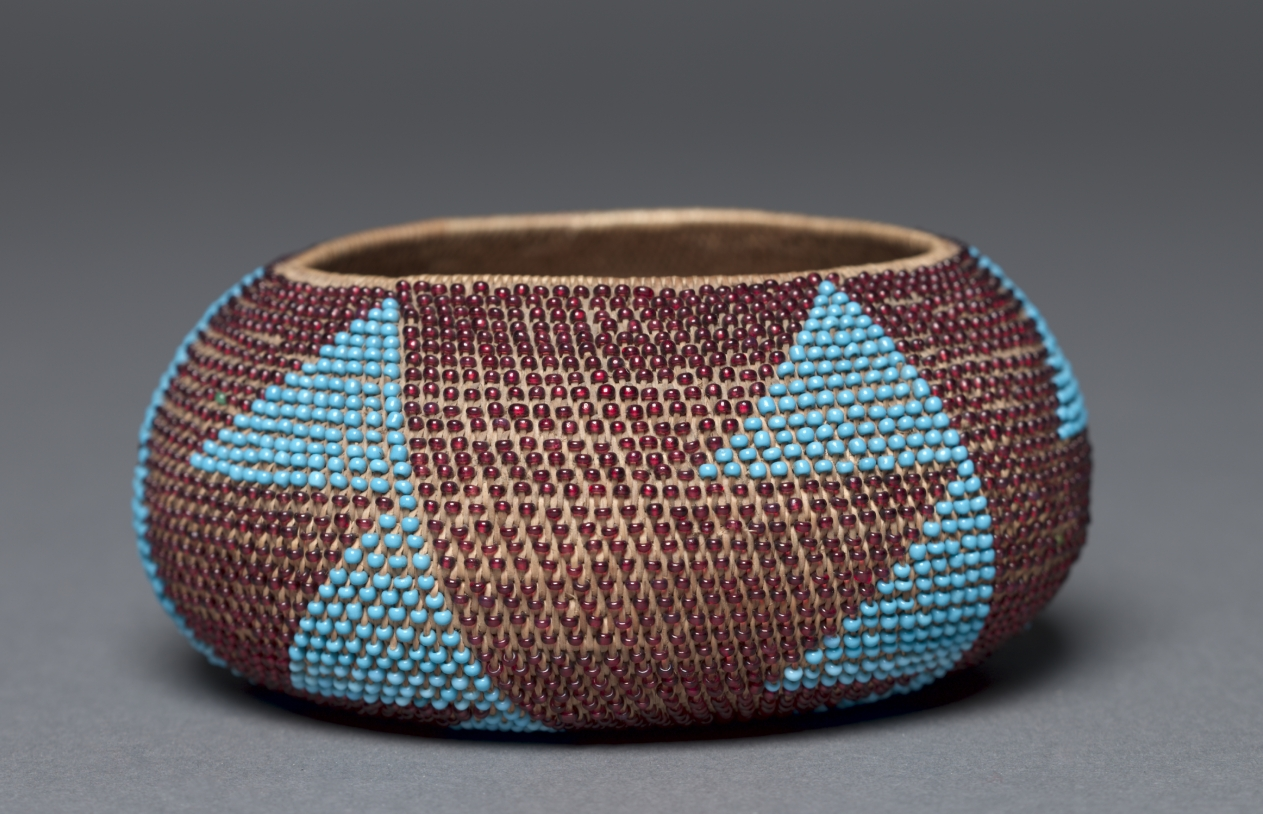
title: Gift Bowl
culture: California, Wappo, late 19th- early 20th century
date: c. 1895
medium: willow, sedge, with beads; coiled (1 rod)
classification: Basketry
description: To allow spirits to circulate freely in a basket, some California weavers provide a spirit door: an intentional design irregularity that can be as subtle as a tiny break in a stitch or as obvious as a feather or a bead of a different color. The single green bead in this superb gift basket may be such a portal.